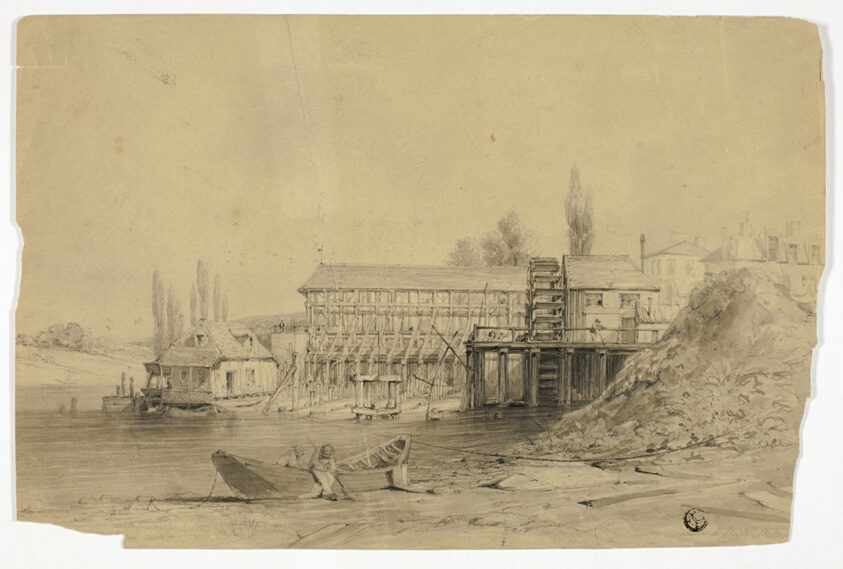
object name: Drawing and Watercolor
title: Machine de Marly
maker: Percival (active 1843)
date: 1843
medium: Brush and gray wash, with graphite, on tan wove paper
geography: Unknown Place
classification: ink or chalk wash; drawings (visual works); prints and drawing